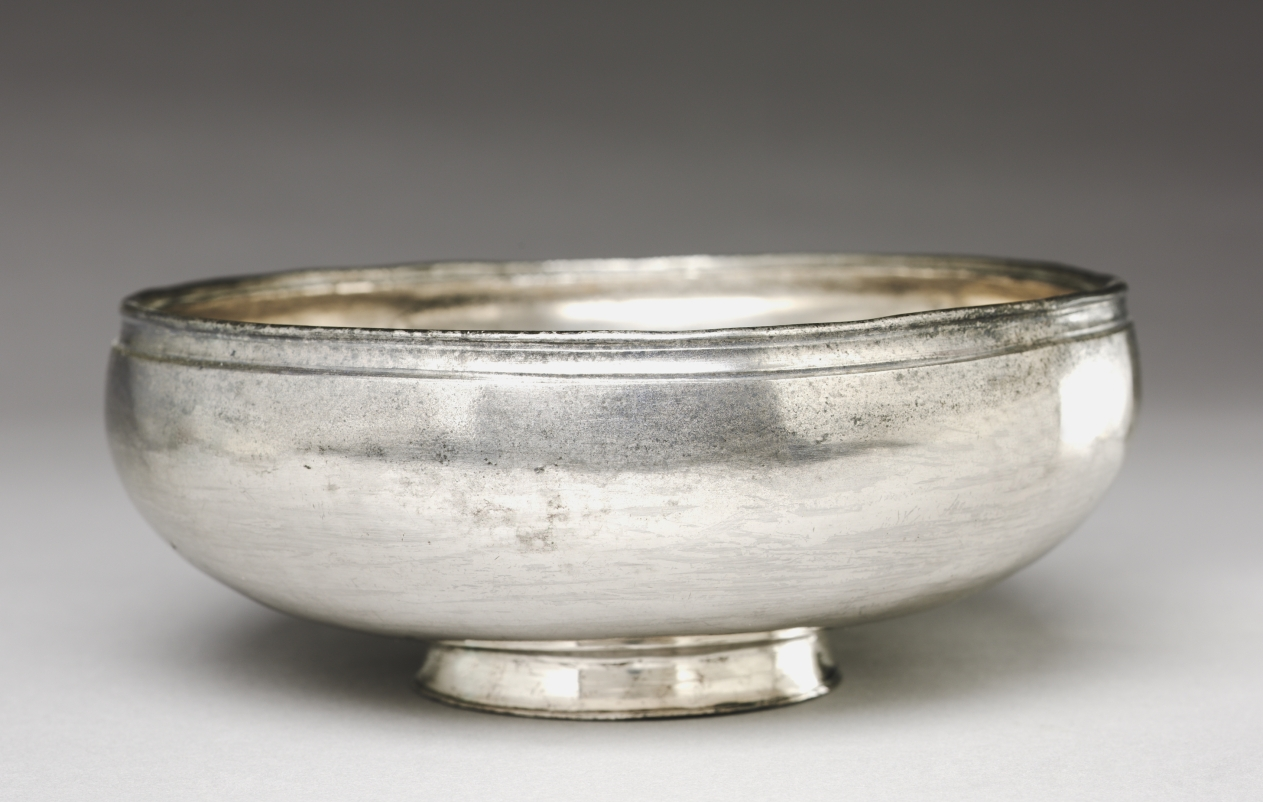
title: Bowl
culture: Byzantium, Syria(?), Byzantine period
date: 350–450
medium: silver with niello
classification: Metalwork